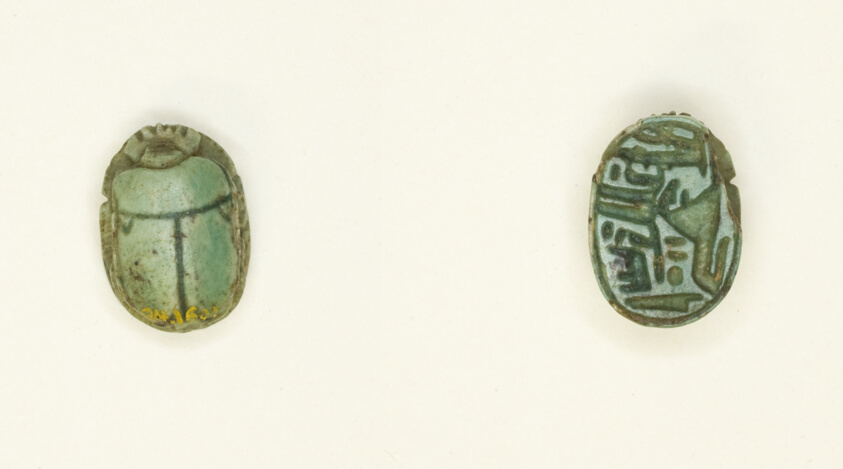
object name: Costume and Accessories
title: Scarab: Criosphinx and Ma’at with Name of Amun-Ra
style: egyptian, ancient, late period (egyptian), new kingdom, third intermediate period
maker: Egyptian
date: New Kingdom–Late Period, Dynasties 18–26 (about 1550–525 BCE)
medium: Faience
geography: Egypt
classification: scarab; ancient art; costume; faïence (composite material)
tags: sphinxes, goddesses, gods (deities), Hieroglyphs, insects, ram